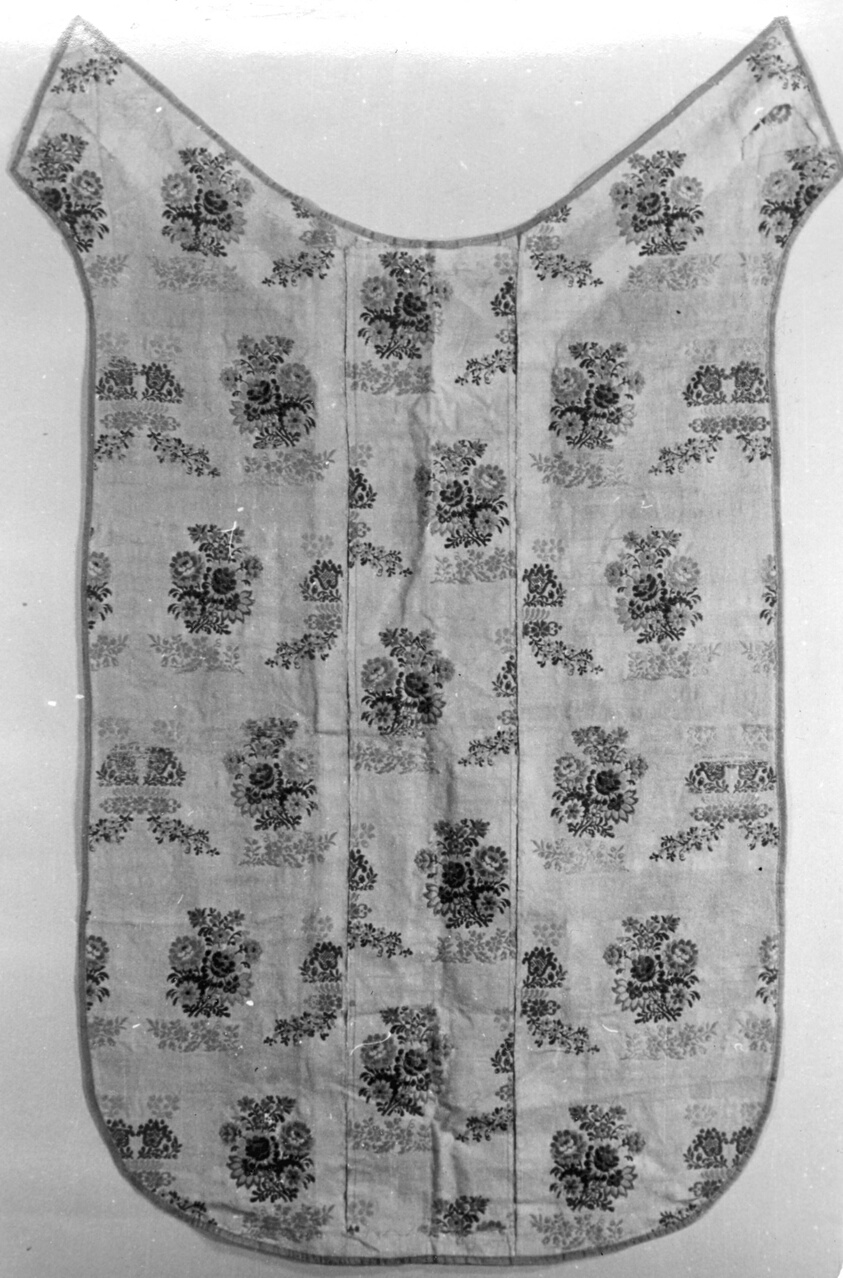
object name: Textile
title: Fragment (Possibly Chausable)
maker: France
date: 1775/1800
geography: France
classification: textile; weaving; liturgical